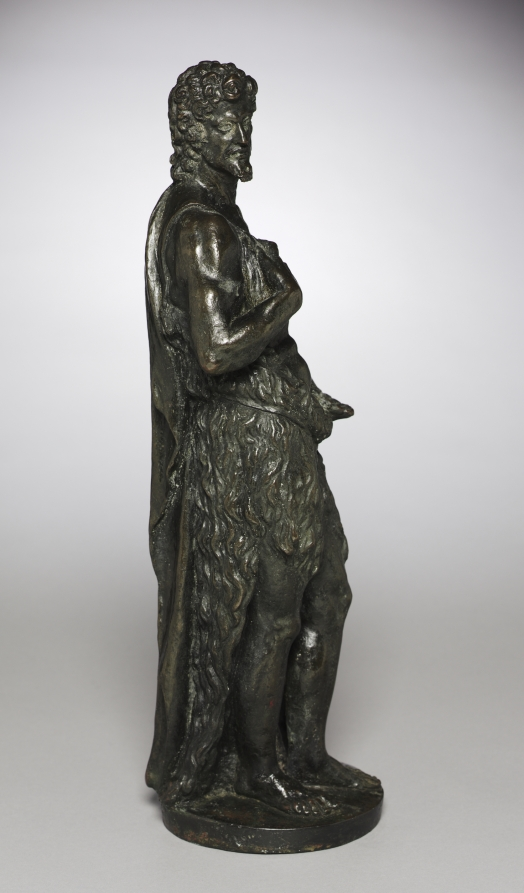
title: Saint John the Baptist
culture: Italy, Verona, 16th century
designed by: Angelo de Rossi (Italian)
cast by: Giuseppe de Levis (Italian, 1605)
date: late 1500s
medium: bronze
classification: Sculpture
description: Saint John wears the hair shirt he fashioned during his retreat into the wilderness to live humbly. He clenches a device of baptism, a shell to pour the water.